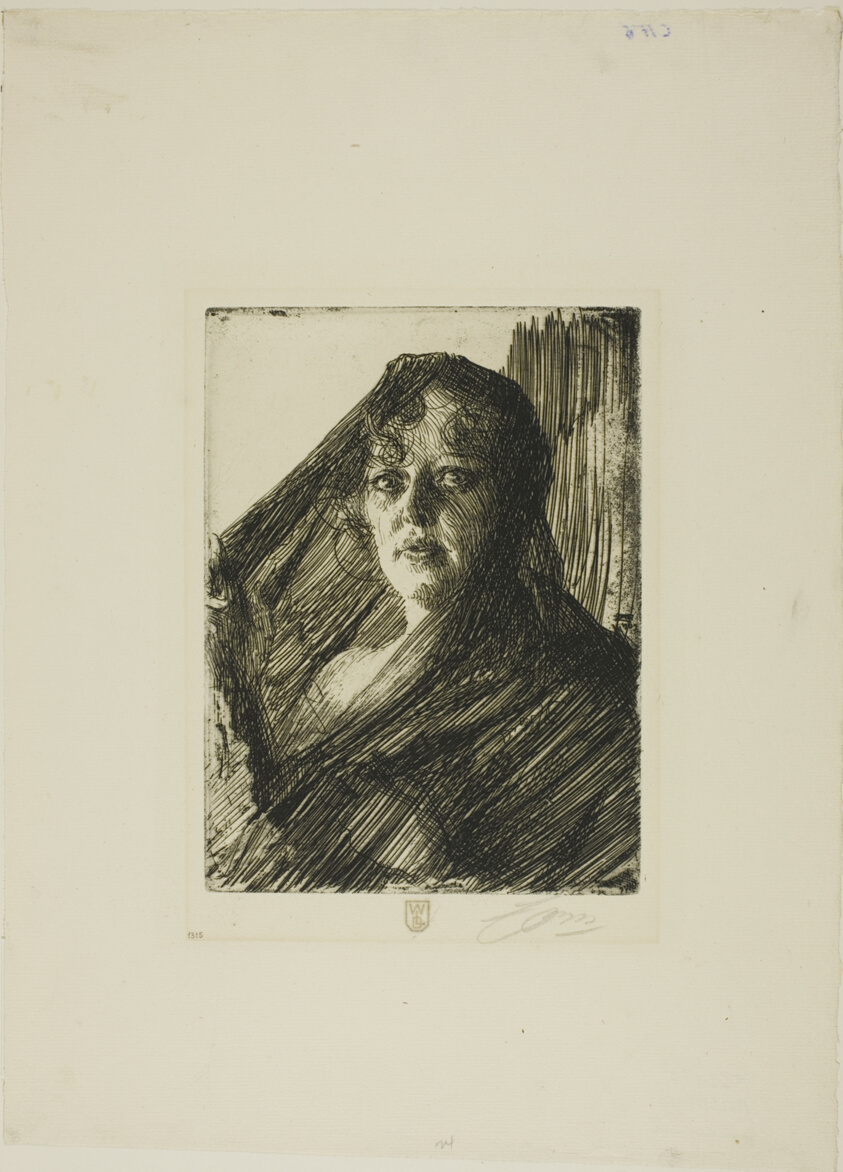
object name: Print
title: Gerda Lundequist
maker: Anders Zorn (Swedish, 1860-1920)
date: 1909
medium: Etching on ivory laid paper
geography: Sweden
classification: etching; print; prints and drawing